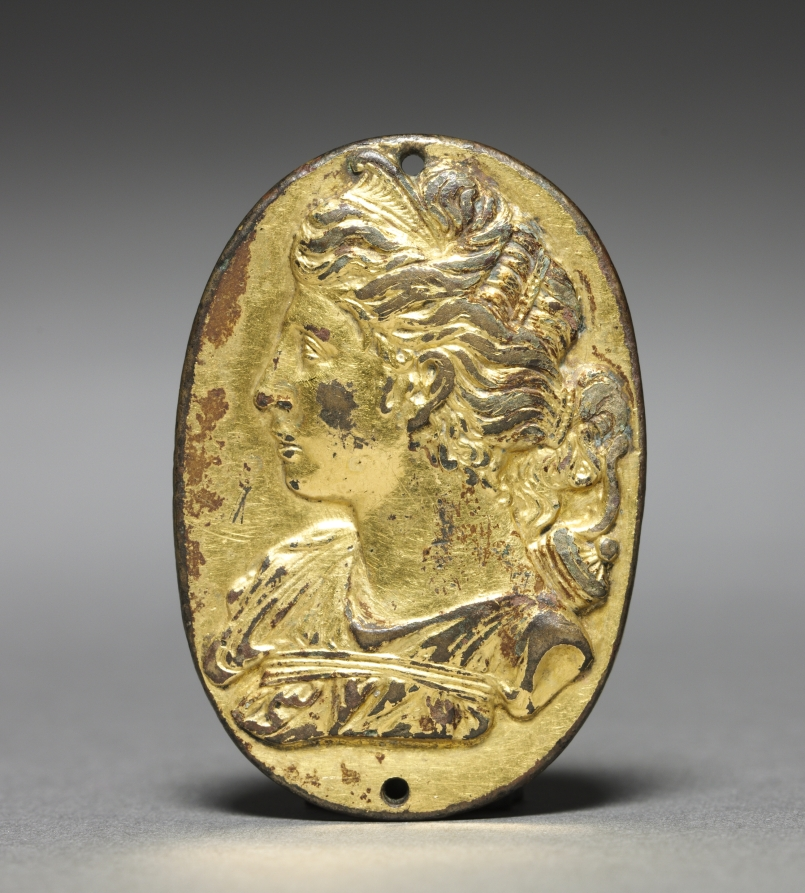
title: Bust of a Woman (Diana?)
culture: Northern Italy, 16th century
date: c. 1500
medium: gilt bronze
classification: Sculpture